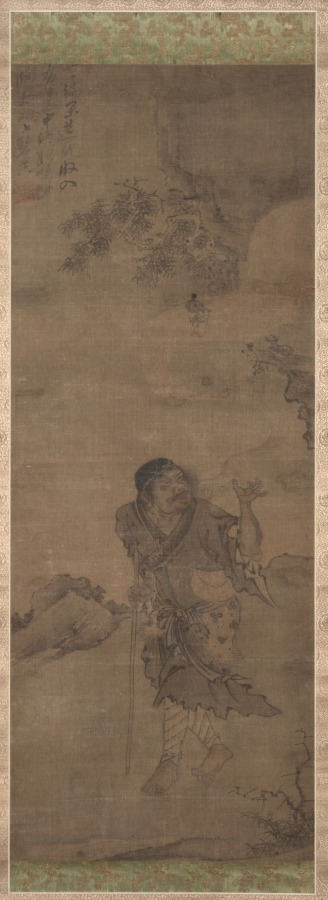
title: Li Tieguai; Liu Haichan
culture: China, Yuan dynasty (1271-1368)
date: 1300s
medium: Pair of hanging scrolls; ink and color on silk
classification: Painting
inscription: Li Tieguai painting inscribed in the upper left corner: The universe which has no limit/ Is all collected in the cloth bag/ At the roadside which has no beginning or end/ One floats up to the blue sky.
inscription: Liu Haichan painting inscribed in the upper right corner: The old tree has its green shrouded in mist/ In the depth of the mountain the moon is bright/ By no means could the eyes of the dusty world/ Understand these particular feelings. Shan-yüeh tao-jen. [seal] Shan-yüeh (?)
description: This pair of hanging scrolls show the Daoist immortals Li Tieguai and Liu Haichan. It is said that Li Tieguai’s ethereal self visited the deified Laozi but when he returned, he found that his own body was burned. He had to inhabit the corpse of a person who used a crutch to walk, and thus gained his name Tieguai—the Iron Crutch. The painting depicts Li Tieguai after he took possession of the body, with the iron staff in his hand. As Li exhales, he blows a small Li Tieguai in the air, showing the immortal’s ability to send his spirit on journeys. Liu Haichan is often shown as a young man wearing bangs across his forehead. He was said to have lived during the Five Dynasties period (907–979) and left his position as a grand councilor to become a hermit. Usually depicted carrying a string of coins and accompanied by a three-legged toad, Liu Haichan became a god of wealth and his toad symbolizes wealth as well. In this scroll, Liu is teasing the three-legged toad with a string of coins tied to his waist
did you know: Li Tieguai walks with an iron crutch, while Liu Haichan is depicted with a three-legged frog.